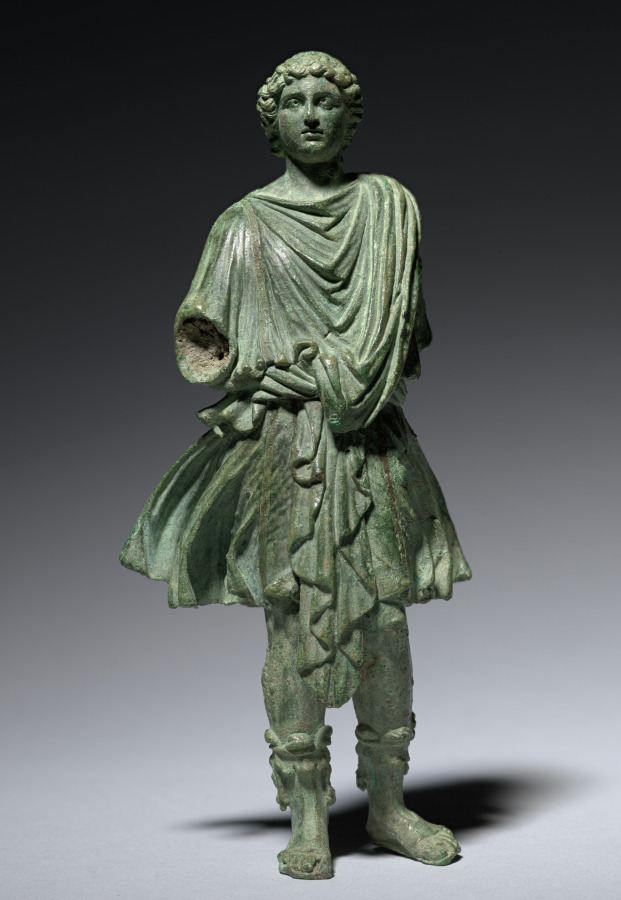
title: Lar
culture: Italy, Rome, Early Imperial period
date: 1–25 CE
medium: bronze with copper inlays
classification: Sculpture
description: This youthful bronze figure wears a short tunic with copper inlaid stripes and open-toed boots with animal-skin liners. The figure’s arms are missing, but based on other surviving examples, they likely held a libation dish and cornucopia. Even without these attributes, the figure can be identified through dress and stance as a type of Lar, or domestic deity, known as the Lar Familiaris (Household Lar), standing in a characteristic "quiet pose." Other types of Lares include the Lares Compitales and Lares Augusti (Lares of crossroads and of Augustus, respectively).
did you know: This statuette likely stood with other small bronzes in a household shrine called a lararium.